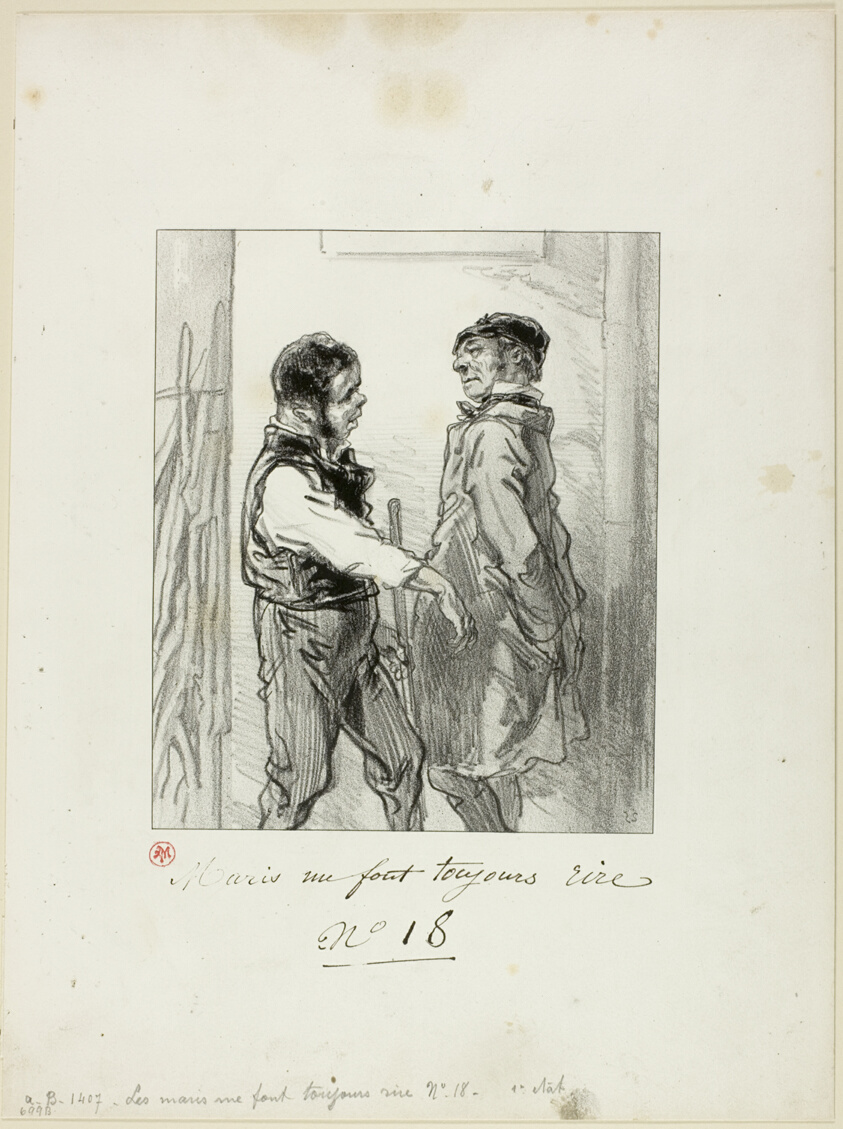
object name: Print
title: Husbands Always Make Me Laugh: And the judge's son told my wife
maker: Paul Gavarni (French, 1804-1866)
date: 1853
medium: Lithograph in black on cream wove paper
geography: France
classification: lithograph; print; prints and drawing